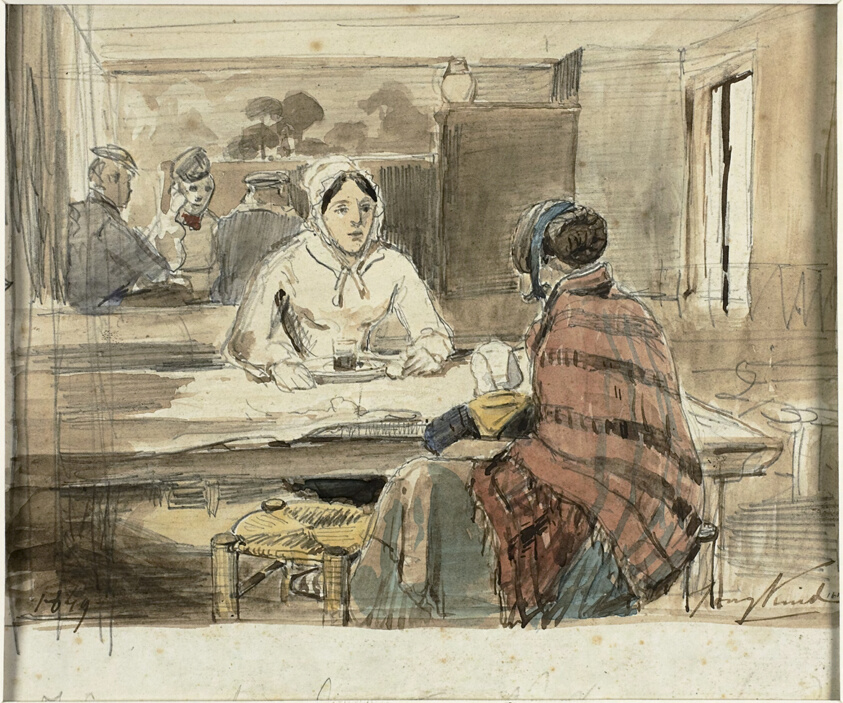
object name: Drawing and Watercolor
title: Landscape with Man on a Donkey (recto) Two Women in a Cafe (verso)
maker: Johan Barthold Jongkind (Dutch, 1819-1891)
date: c. 1849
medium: Watercolor, with graphite, on ivory wove paper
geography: Holland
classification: watercolor; drawings (visual works); prints and drawing